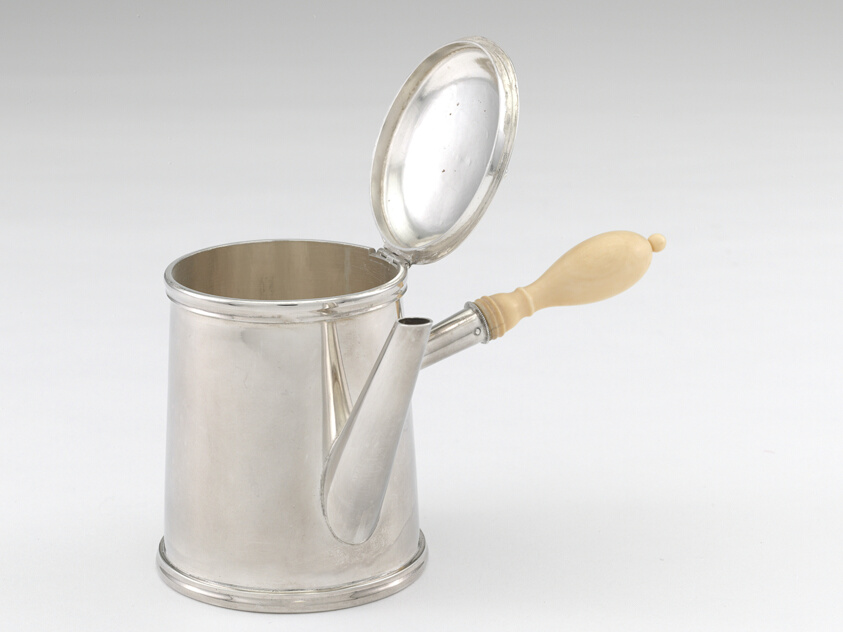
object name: Metalwork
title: Chocolate Pot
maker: Jones, Ball & Poor; American, 1846–1853; Boston Massachusetts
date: c. 1846–53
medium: Silver and ivory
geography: Boston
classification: chocolate pot; silver; vessel for serving drinks; american decorative arts; american arts; decorative arts